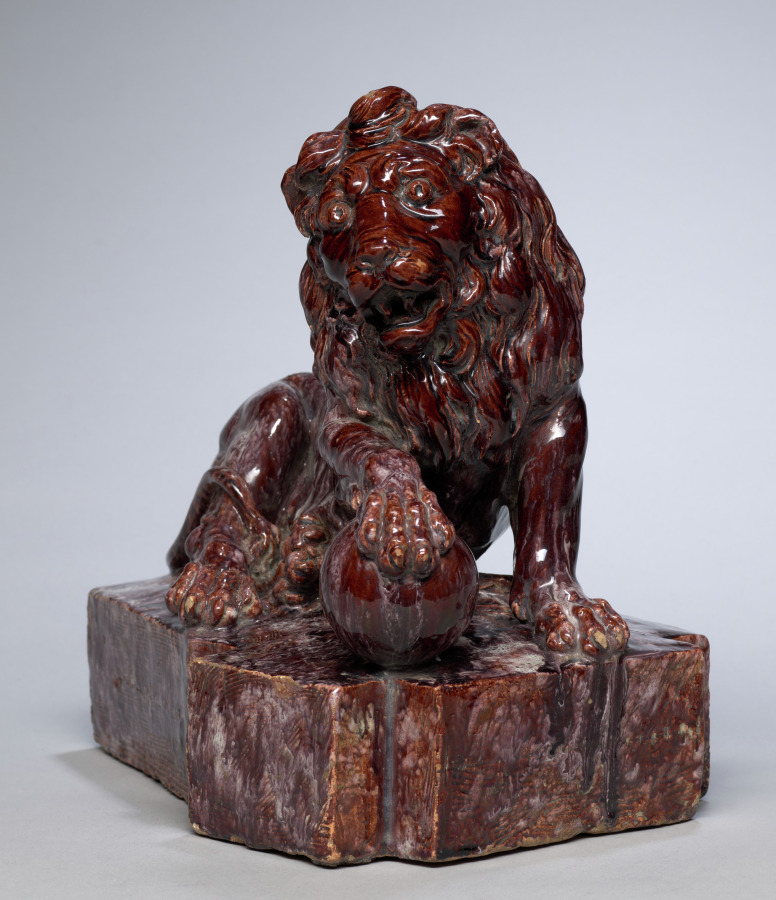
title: Lion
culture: France, 20th century (?)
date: 1900s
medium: terracotta glazed in mottled purple tin glaze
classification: Ceramic